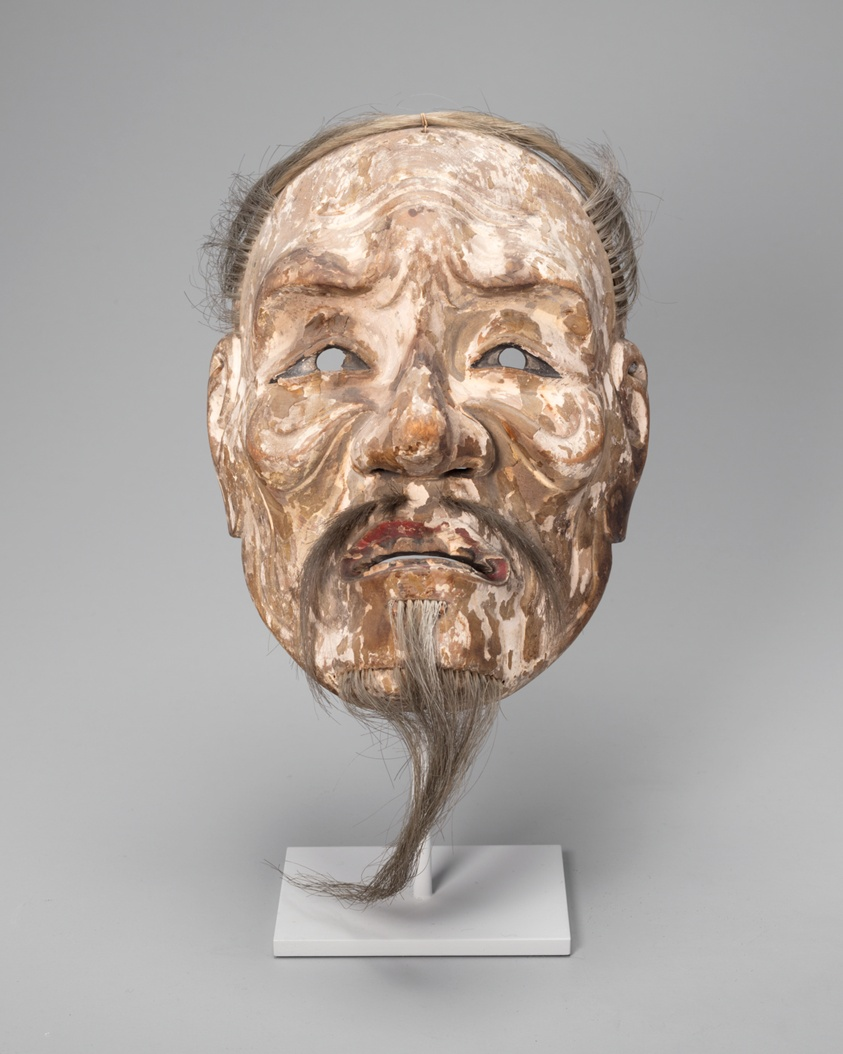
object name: Mask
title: Asakurajô (Old Man Asakura) Noh mask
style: Japanese (culture or style)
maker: Japan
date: 16th century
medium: Japanese cypress, colors, and horsehair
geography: Japan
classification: wood; masks; asian art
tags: masks